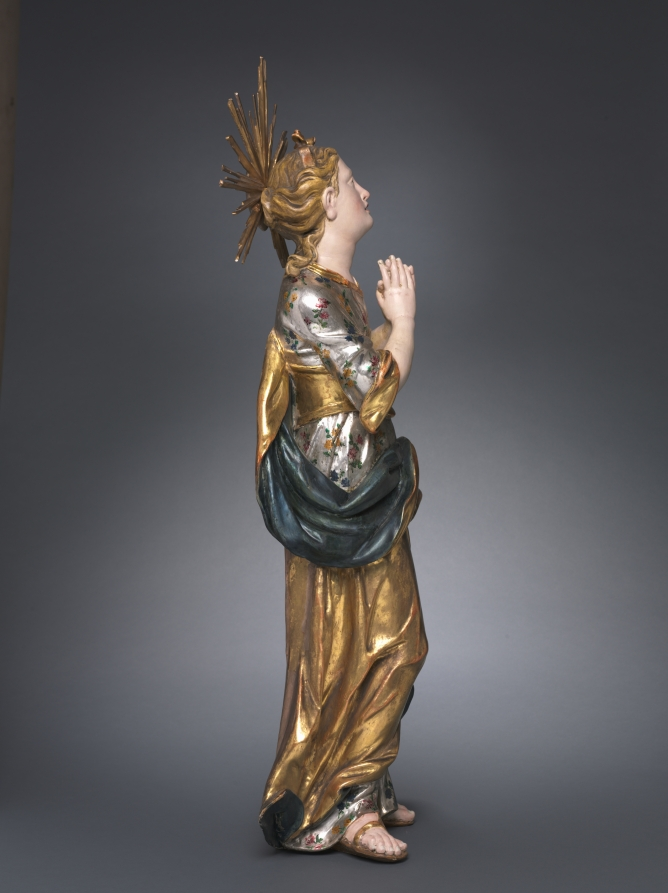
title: Virgin Mary as a Child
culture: Austria, Vienna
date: 1750–75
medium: painted and gilded wood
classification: Sculpture